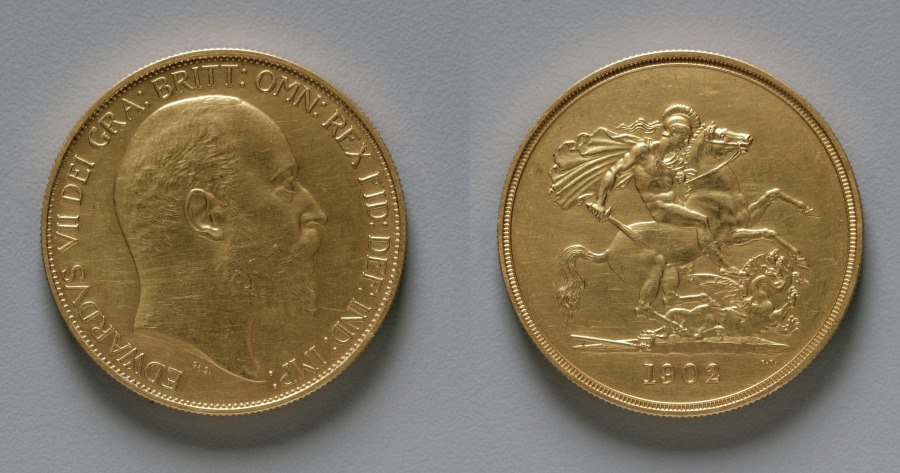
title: Five Pound Piece: Edward VII (obverse); St. George and the Dragon (reverse)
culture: England, Edward VII, 1901-1910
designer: after Benedetto Pistrucci (Italian, 1784–1855)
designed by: George Edward de Saulles (British)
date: 1902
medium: gold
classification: Coins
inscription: EDWARDVS VII DEI GRA: BRITT: OMN: REX FID: DEF: IND: IMP:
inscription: 1902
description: Struck for inclusion in the proof commemorative sets of the new coinage of the reign, this piece was unusual in having a frosted or matte surface, produced by the application of acid. Non-proof five-pound pieces were also struck, but not for circulation. George Edward de Saulles was appointed chief engraver at the Royal Mint in 1892. At his death, the position was abolished for the sake of 'greater freedom in obtaining designs." There is still, however, a body of engravers at the mint to carry out the work necessary in adapting coin designs and making the dies.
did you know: George Edward de Saulles designed coins under Queen Victoria and King Edward VII.